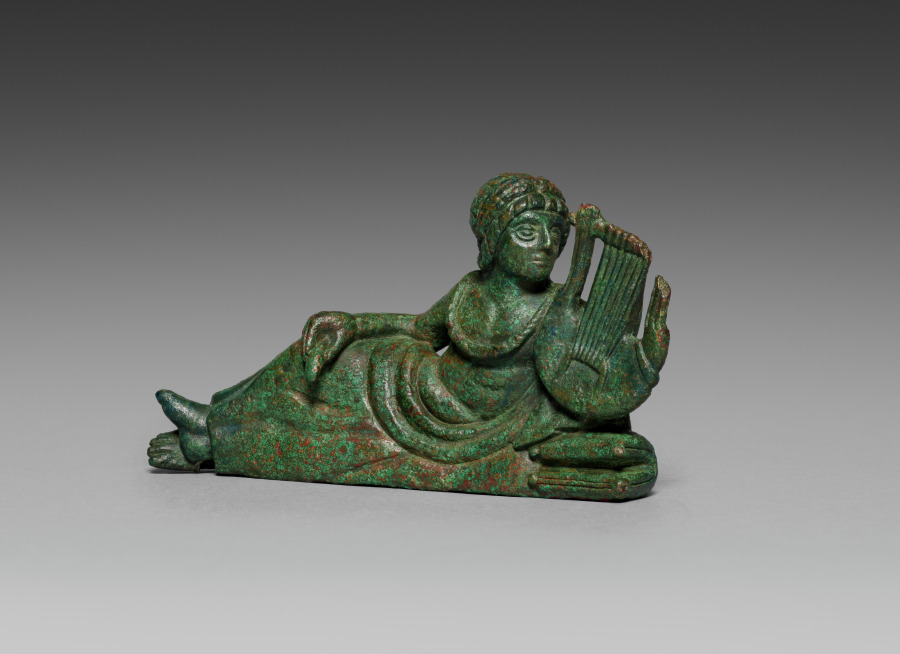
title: Vessel Ornament of Reclining Lyre-player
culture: Etruscan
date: probably 400–375 BCE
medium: bronze with gilding traces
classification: Sculpture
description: This bronze banqueter figurine was one of six once adorning the rim of a large basin, now lost. Cast in molds with individualized details, most have grooves on their underside to attach to the basin. Minute traces of gilding remain on areas of clothing and skin (mostly visible only under magnification), suggesting that they may have been completely gilded. Two handles in the form of hippocampi, horses with serpentine tails, also belonged to the basin and are now displayed at the Michael C. Carlos Museum at Emory University. The basin may have been used to hold liquid for a banquet, or was perhaps funerary. This reclining banqueter holds a lyre in his left hand and an oblong pick in his right hand. His face tilts toward the lyre and garlands hang around his head and chest. Two bare feet emerge from the bottom of the himation in a position distinct from the feet of the other figurines in this group. Some gilding remains on the top edges of the lyre and on the banqueter’s lips and drapery.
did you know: The lyre held by this banqueter bears traces of gilding.